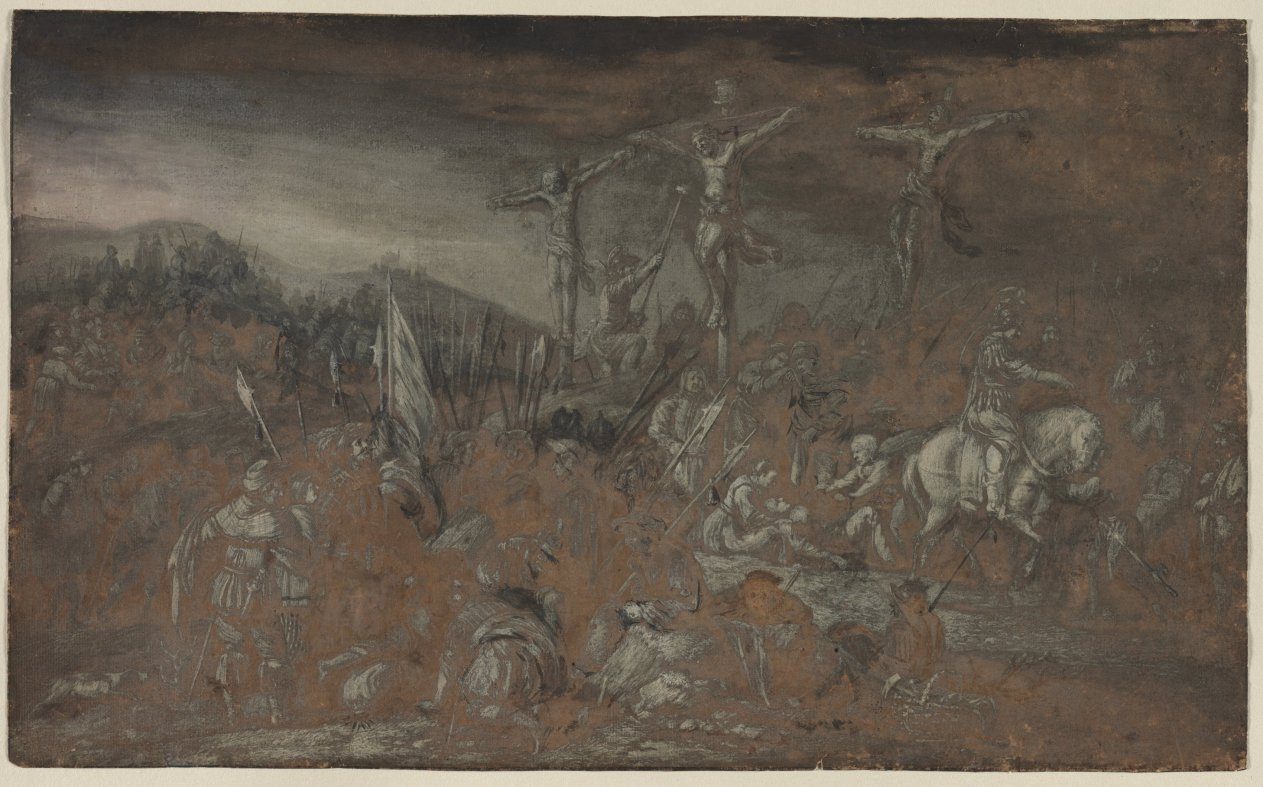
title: The Crucifixion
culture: Netherlands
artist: Gerrit van Battem (Dutch, c. 1636–1684)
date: mid-1600s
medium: gouache; framing lines in black ink and graphite(?)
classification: Drawing